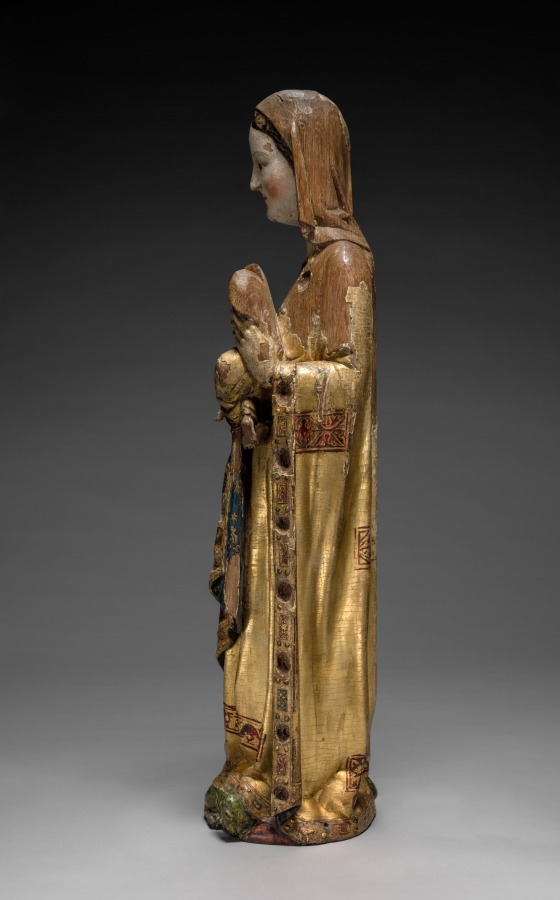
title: Virgin and Child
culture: Mosan (Valley of the Meuse), Liège(?), late 13th century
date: late 1200s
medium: wood (oak) with polychromy and gilding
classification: Sculpture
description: This sculpture is a rare survival in wood from the valley of the Meuse River (modern Belgium and Holland), an important region for the production of ecclesiastical art in the 1100s and 1200s. The elegantly draped figure is remarkable for the preservation of much of its original paint and gilding, including the Virgin's gilded mantle highlighted with decorative bands of geometric patterns and the green dragon on which she stands. There are small settings around the Virgin's neck and along the border of the mantle that would have originally been set with gem and glass cabochons in imitation of the richly adorned metalwork for which Mosan art was highly esteemed. The settings for these cabochons provide some hint of the original opulence of this sculpture. The Virgin's serene features and beautiful countenance are noteworthy, as is the refined execution of the draperies.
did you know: Dragons, like the one Mary is standing on, sometimes look more like snakes in medieval art.